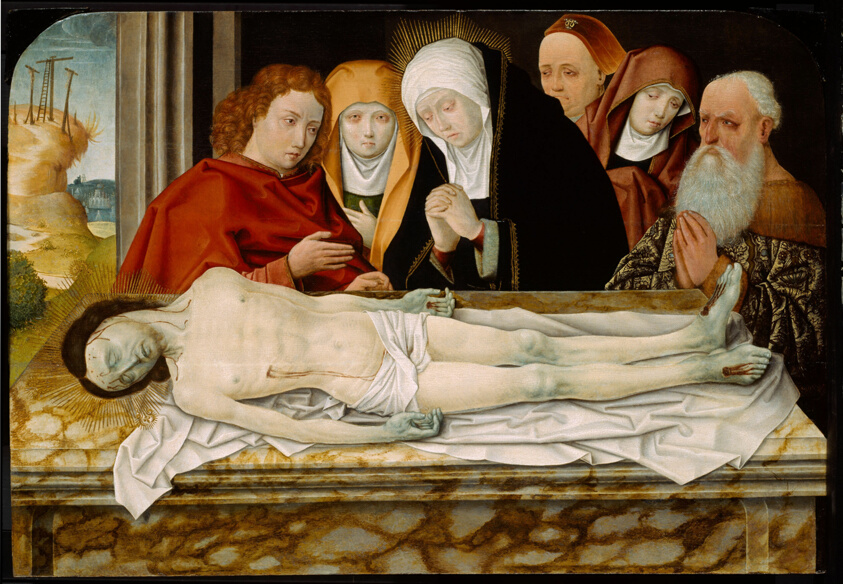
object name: Painting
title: Entombment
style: 16th Century, sixteenth century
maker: German; possibly Cologne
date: c. 1500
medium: Tempera on panel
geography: Germany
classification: painting; german; paint; tempera; european painting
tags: Burial, Christian subjects, Christianity, religious figures, religious scenes, religious, religion, biblical, death, cross, Virgin Mary, Jesus, men, women, Mourning, Century of Progress, world's fairs, Chicago World's Fairs